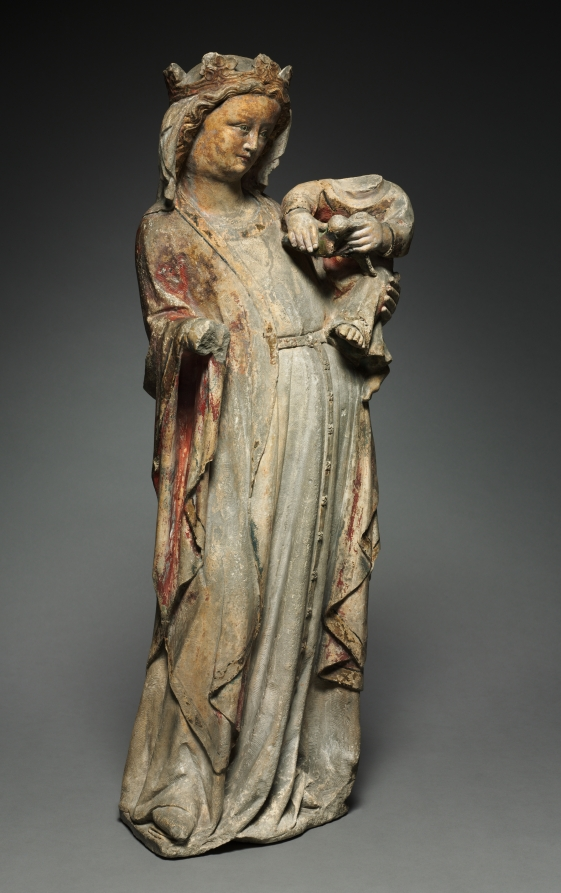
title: Virgin and Child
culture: France, Lorraine, 14th century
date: c. 1315–20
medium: limestone with traces of polychromy and gilding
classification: Sculpture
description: This graceful Virgin and child is a beautiful example from a large number of such figures produced in Lorraine, in eastern France, during the early 1300s. Lorraine at the time had a well-established artistic tradition and was under the rule of the Counts of Bar with established cultural links to both Flanders and England. Many of the surviving Lorraine Virgins share common characteristics consistent with this example--the swaying posture, with the weight of the Virgin placed on the left foot; and an open mantle with an exposed belted gown, the girdle itself trailing to the ground and ornamented with rosettes. Such standing figures were likely made for use in parish churches, cathedrals, aristocratic oratories, and monastic chapels, and attest to the intense veneration rendered to the Virgin during the period.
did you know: The CMA has a rare example of a similar woman’s belt (1930.742).